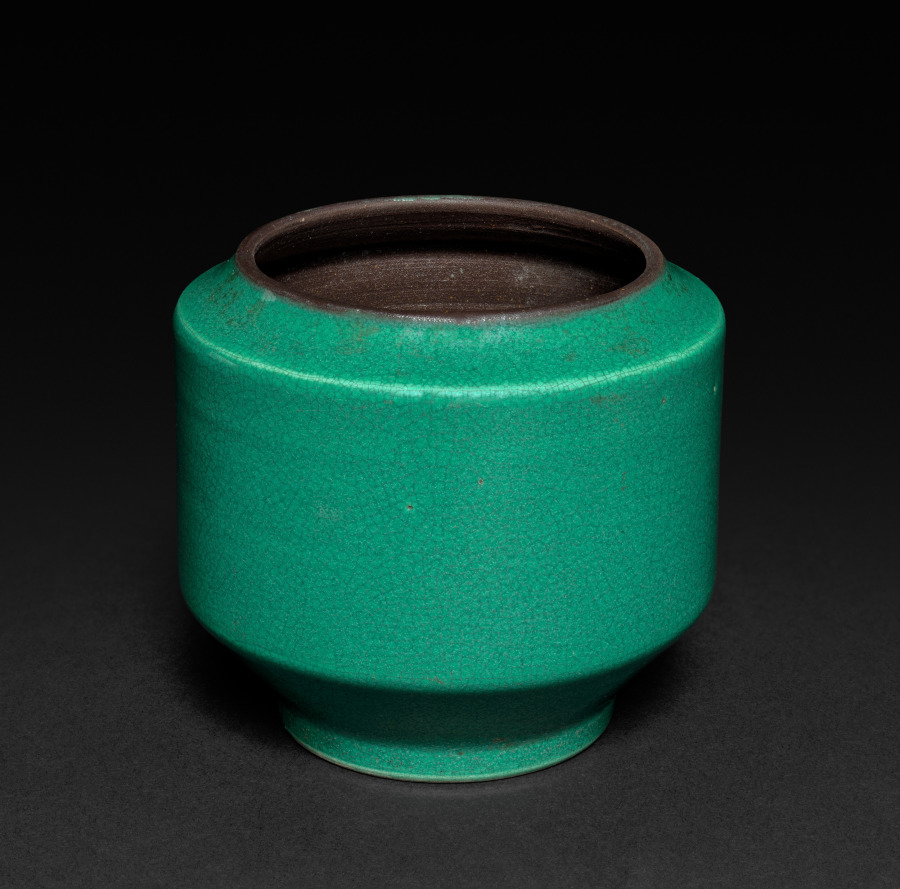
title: Camellia-Leaf-Green Cylindrical Vase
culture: China, Qing dynasty (1644-1911), Kangxi reign (1661-1722)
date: 1661–1722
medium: porcelain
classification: Ceramic